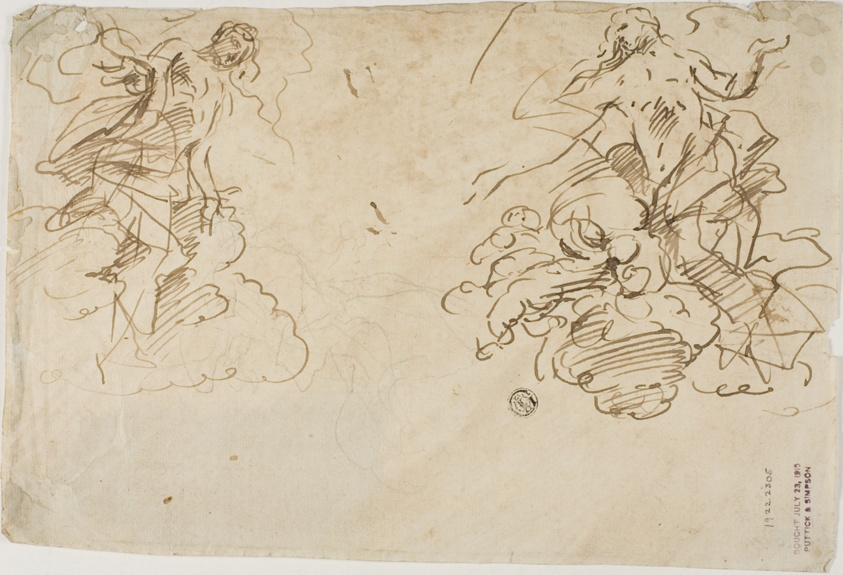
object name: Drawing and Watercolor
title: Two Figures in Clouds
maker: Unknown Artist; Italian, 1600-1799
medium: Pen and brown ink, with black chalk, on ivory laid paper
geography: Italy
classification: pen and ink drawings; drawings (visual works); prints and drawing